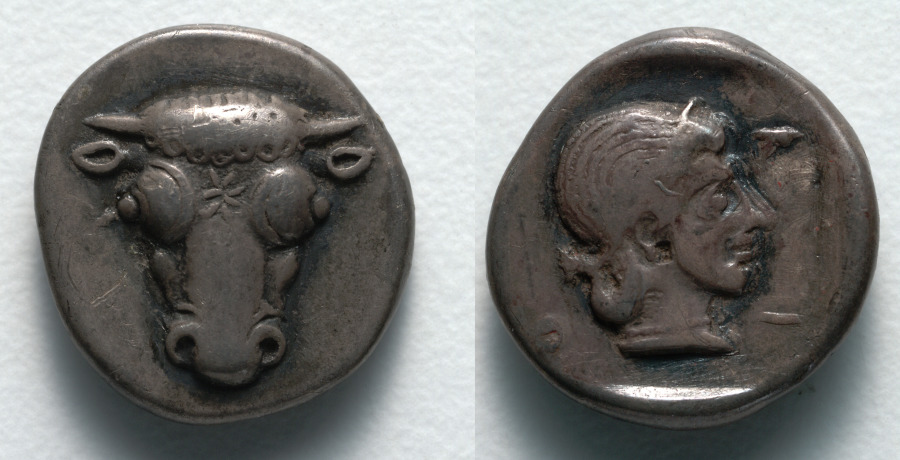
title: Hemidrachm: Bull's Head (obverse); Head of Artemis (reverse)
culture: Greek, probably minted at Phokikon (Phokis)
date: c. 485–480 BCE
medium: silver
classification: Coins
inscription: Φ[OK]I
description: The head of a bull, its characteristic star-like fur and bulbous eyes particularly noticeable, dominates the obverse of this coin. On the reverse is Artemis, whose hair is curled back in the krobylos style using a hairnet. The unusual lines above Artemis’s nose and below her chin suggest that the reverse may have been struck with the same design twice.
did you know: The punches in Artemis’s neck were probably made to check the metal quality.